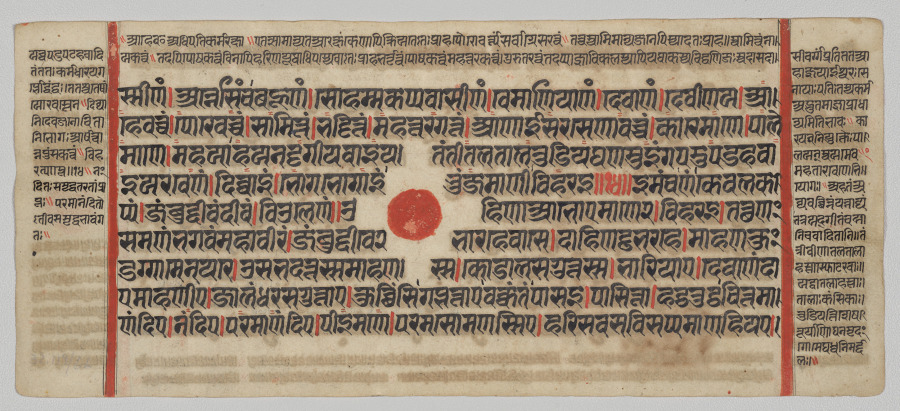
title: Text, folio 6 (recto), from a Kalpa-sutra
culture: Western India, Gujarat, last quarter of the 15th century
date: c. 1475–1500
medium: Gum tempera, ink, and gold on paper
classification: Painting